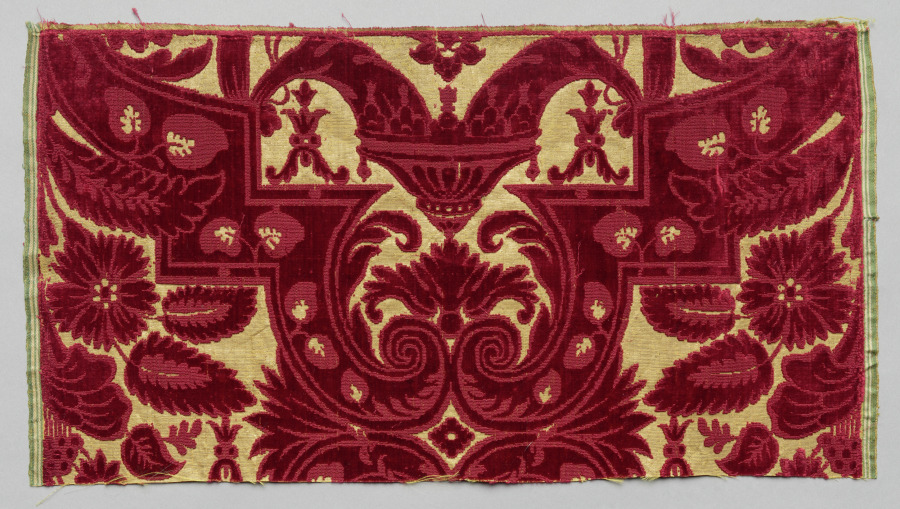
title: Velvet Fragment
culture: Italy, Genoa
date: 1600s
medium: velvet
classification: Velvet